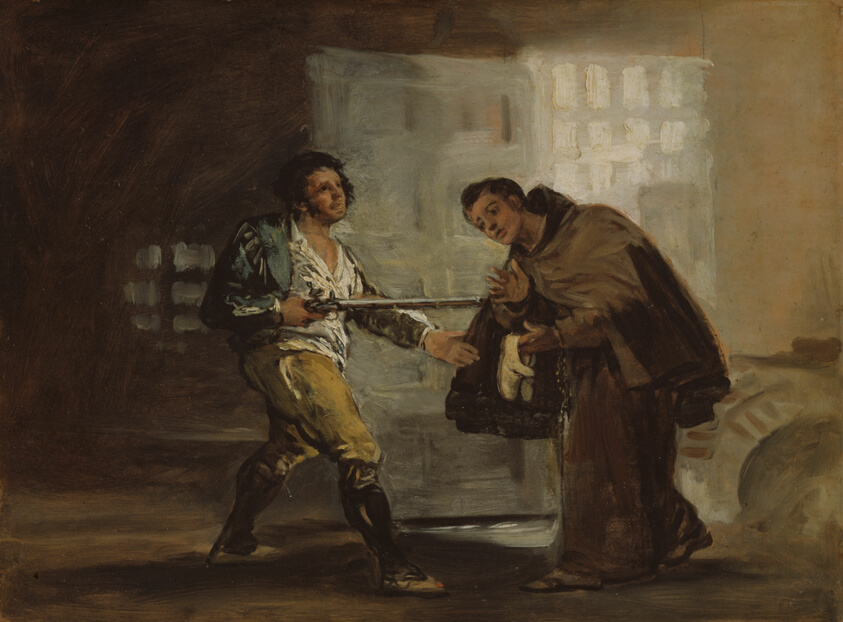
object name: Painting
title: Friar Pedro Offers Shoes to El Maragato and Prepares to Push Aside His Gun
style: nineteenth century, 19th century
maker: Francisco José de Goya y Lucientes (Spanish, 1746–1828)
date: c. 1806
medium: Oil on panel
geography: Spain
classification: oil on panel; oil paintings (visual works); paint; spanish; painting; european painting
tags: Narrative, shoes, doors, friars, guns, men, prisoners, Spain, violence, Century of Progress, world's fairs, Chicago World's Fairs